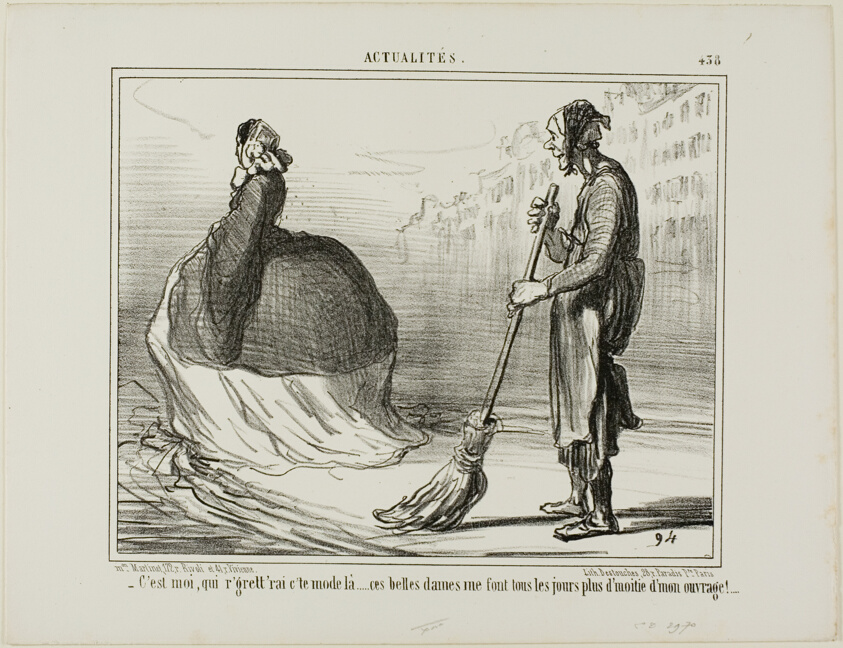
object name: Print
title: “- I'd regret if this mode gets to be out of fashion one day... these ladies are doing half of my job!,” plate 438 from Actualités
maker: Honoré Victorin Daumier; French, 1808-1879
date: 1857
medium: Lithograph in black on white wove paper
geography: France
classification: lithograph; print; prints and drawing